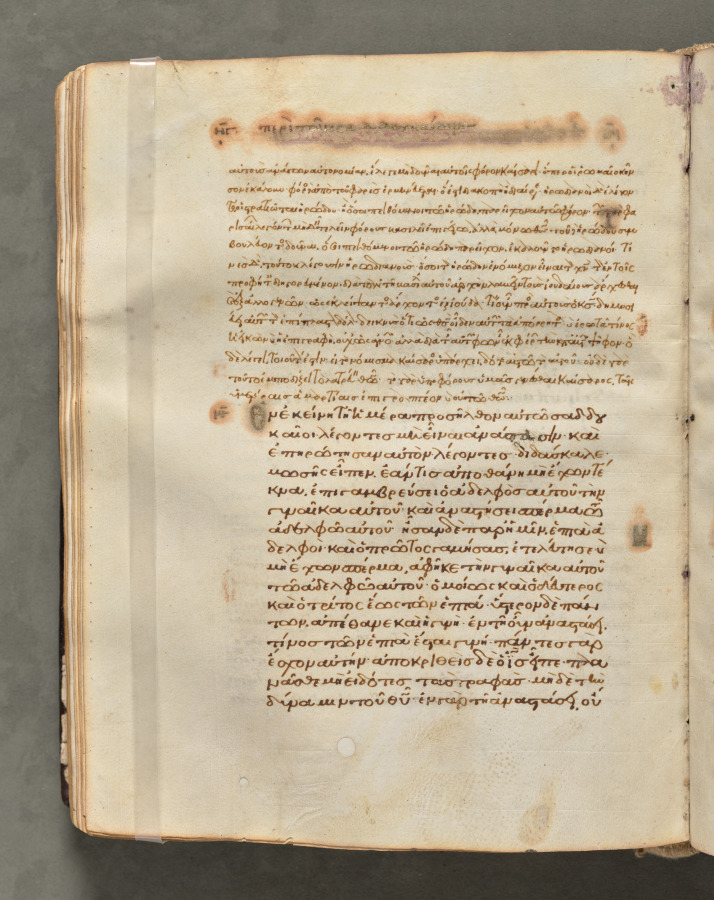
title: Text, folio 98 (verso), from a Gospel Book with Commentaries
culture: Byzantium, Constantinople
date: c. 1000–1100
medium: ink, tempera, and gold on vellum; leather binding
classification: Bound Volume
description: Each of the four gospels in this book opens on a page with brilliantly illuminated borders depicting the author of the text as well as birds-principally peacocks, symbols of the immortality of the soul-and fountains, representing the fountain of life and the salvation of the soul. This volume consists of 428 leaves with texts in Greek. Its level of sophistication suggests that it was probably written and decorated in a monastery in Constantinople.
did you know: Gospel Books were carried in procession through Byzantine churches.